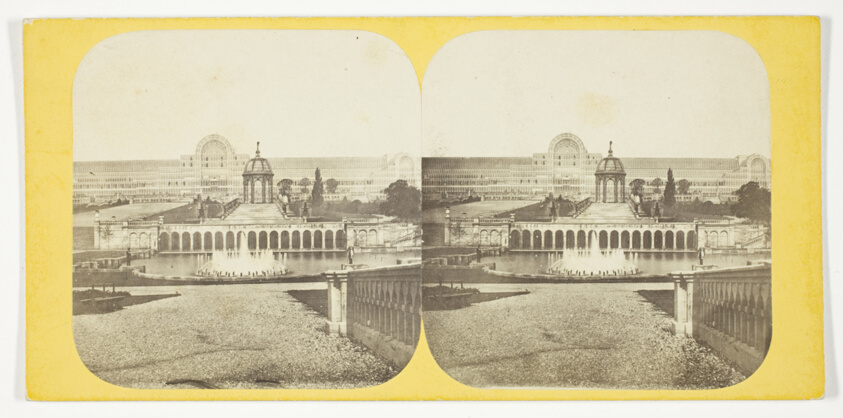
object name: Photograph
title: Crystal Palce: General View of the Palace, Cascades and Lower Fountains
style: 19th century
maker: Artist unknown; English, late 19th century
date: 1850/99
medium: Albumen print, stereo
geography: London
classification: photography; photograph